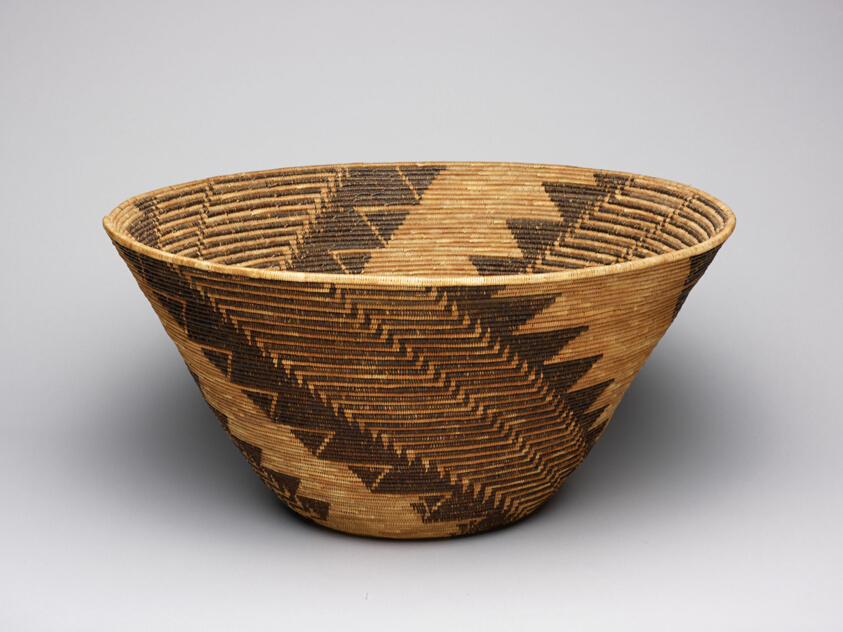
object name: Basketry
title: Food Basket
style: maidu, native american, northern california, americas, native north american, Arts of the Americas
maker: The mother of Salena Jackson; Maidu, active late 19th/early 20th century; Near Susanville, northern California, United States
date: 1870–90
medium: Plant fibers and pigment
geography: Northern California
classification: basketry; art of the americas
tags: basketry, baskets, storage, zigzags, geometric, feast